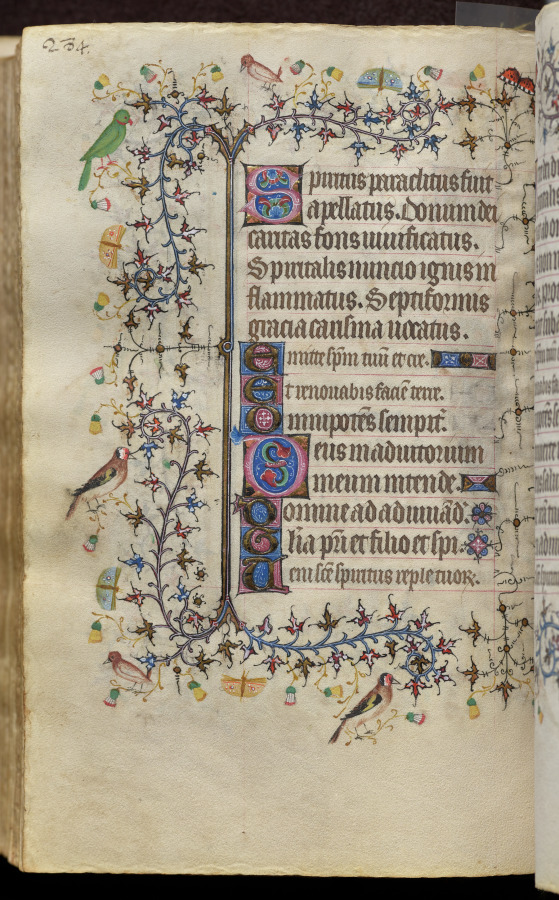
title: Hours of Charles the Noble, King of Navarre (1361-1425): fol. 142v, Text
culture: France, Paris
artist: Master of the Brussels Initials and Associates (French)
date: c. 1405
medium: ink, tempera, and gold on vellum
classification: Bound Volume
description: This precious volume was obviously highly prized by its owner, the French-born King of Navarre, who had his coat of arms painted on no less than twenty folios. Rather than directly commissioning this manuscript from a specific workshop, it seems that Charles the Noble acquired his book of hours -- perhaps ready-made for the luxury market -- while on a trip to Paris in 1404-05. A collaborative effort, six painting styles are evidenced within the pages of this codex, those of two Italians, two Frenchmen, and two Netherlanders. The painter who was responsible for the planning and decoration of the book, and who produced seventeen of the large miniatures, was a Bolognese artist known as the Master of the Brussels Initials. His principal assistant, responsible for most of the borders, was a Florentine who signed his name "Zecho" da Firenze on folio 208 verso.